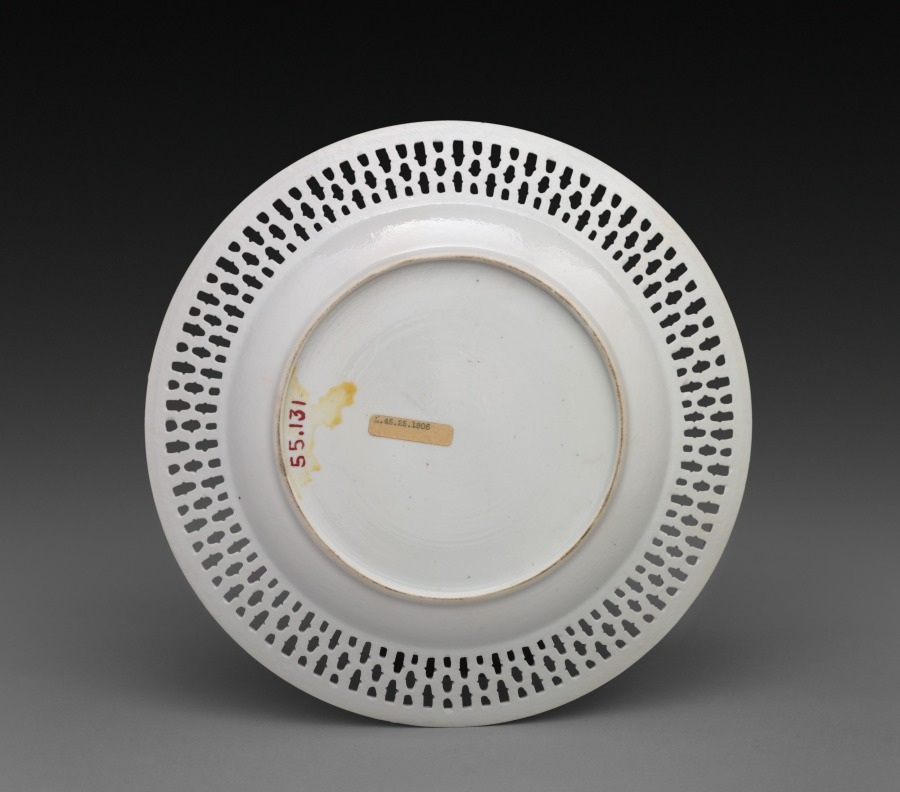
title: Plate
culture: China, Chinese Export, 18th century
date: before 1785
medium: porcelain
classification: Ceramic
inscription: "DUM SISTO VIGILO."